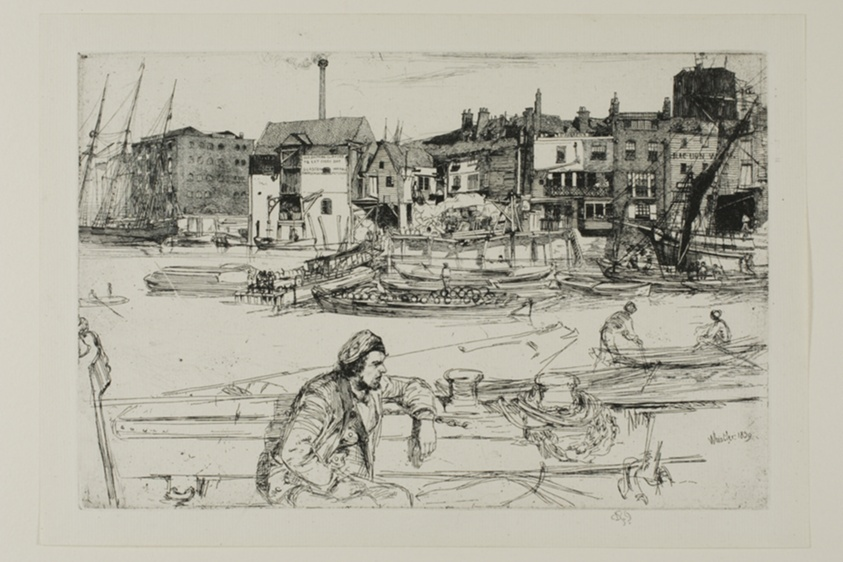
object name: Print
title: Black Lion Wharf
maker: James McNeill Whistler (American, 1834-1903)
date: 1859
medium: Etching with foul biting in black ink on ivory laid paper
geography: United States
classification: etching; foul biting; print; prints and drawing; paper